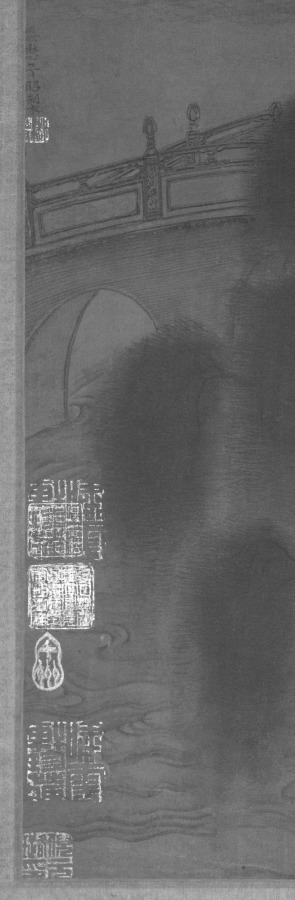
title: Court Ladies in the Imperial Palace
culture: China, Yuan dynasty (1271-1368)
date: 1271–1368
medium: hanging scroll, color on silk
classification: Painting